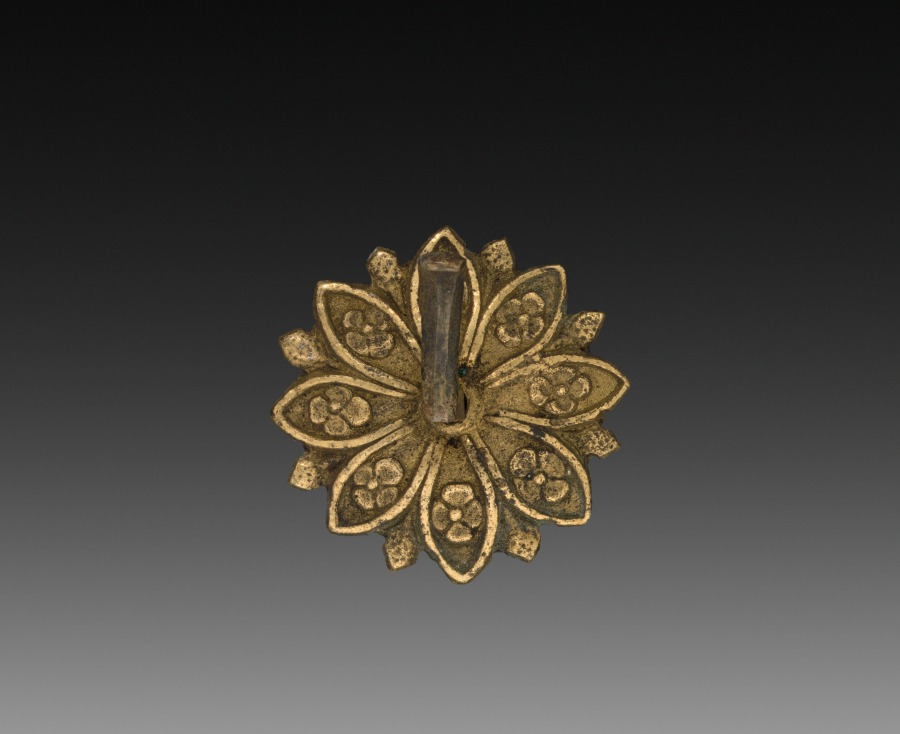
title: Ornamental Hook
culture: France, 18th century, Period of Louis XVI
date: 1775–1799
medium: gilt bronze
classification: Metalwork